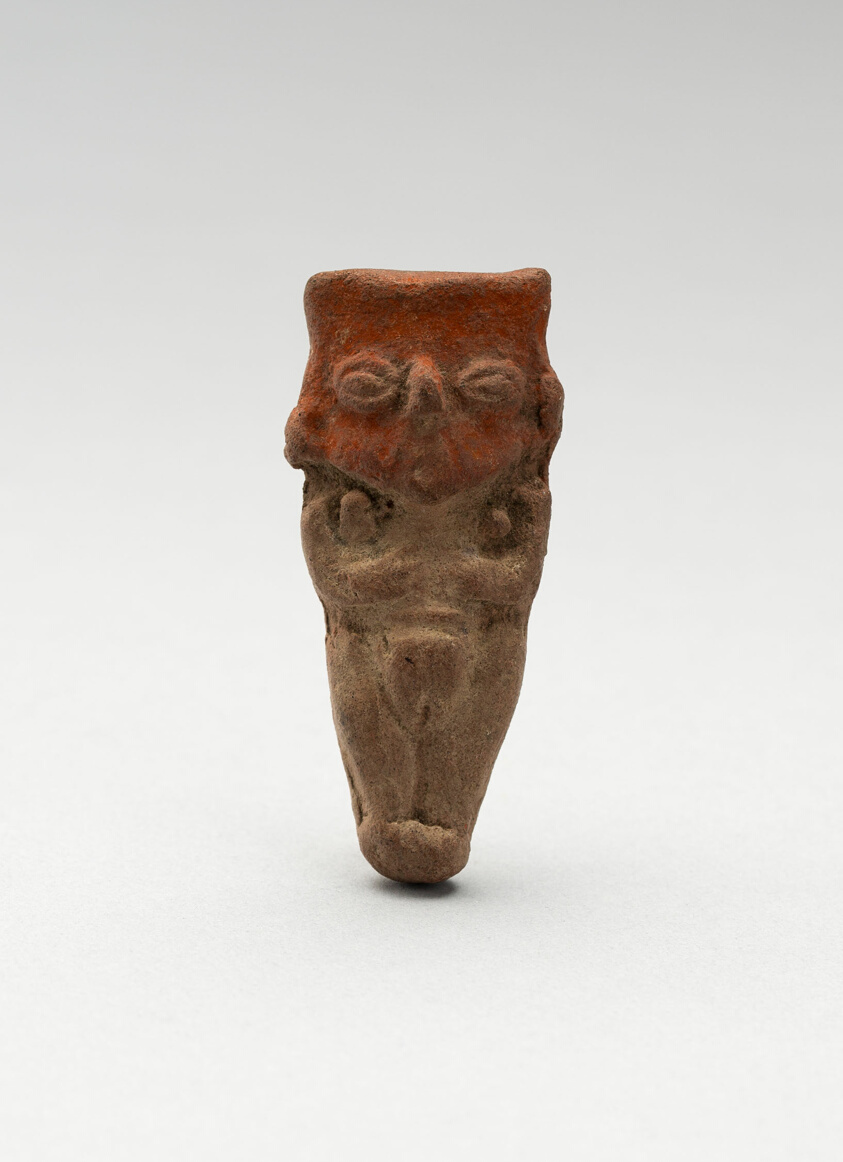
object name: Sculpture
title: Mold-Made Female Figurine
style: moche, Arts of the Americas, andean, andes, south american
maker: Possibly Moche; Possibly north coast, Peru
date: c. 100–600 CE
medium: Ceramic and pigment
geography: Peru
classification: earthenware; ceramics; sculpture; art of the americas